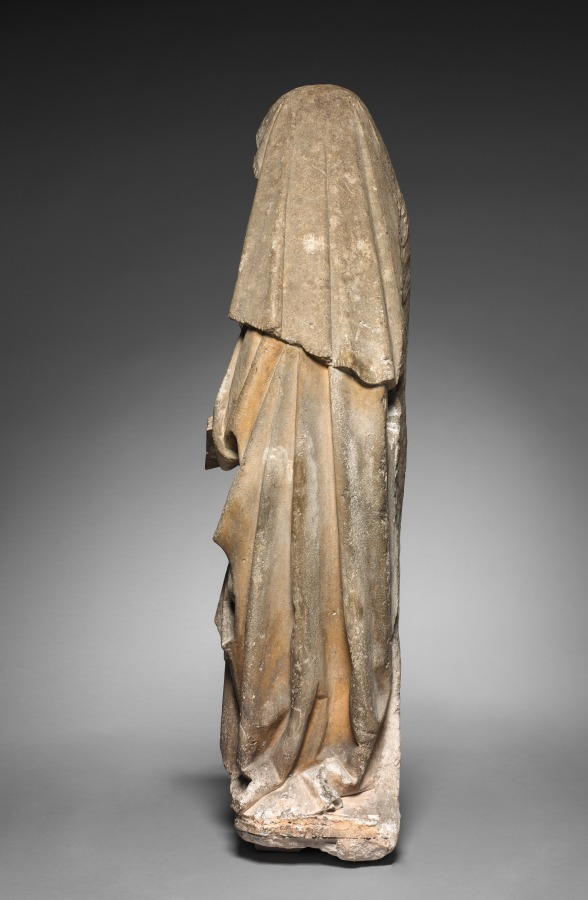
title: Education of the Virgin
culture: France, Bourbonnais, 16th century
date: c. 1500–1510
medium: limestone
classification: Sculpture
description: This relief depicts the young Virgin Mary learning to read at the knee of her mother Anne.